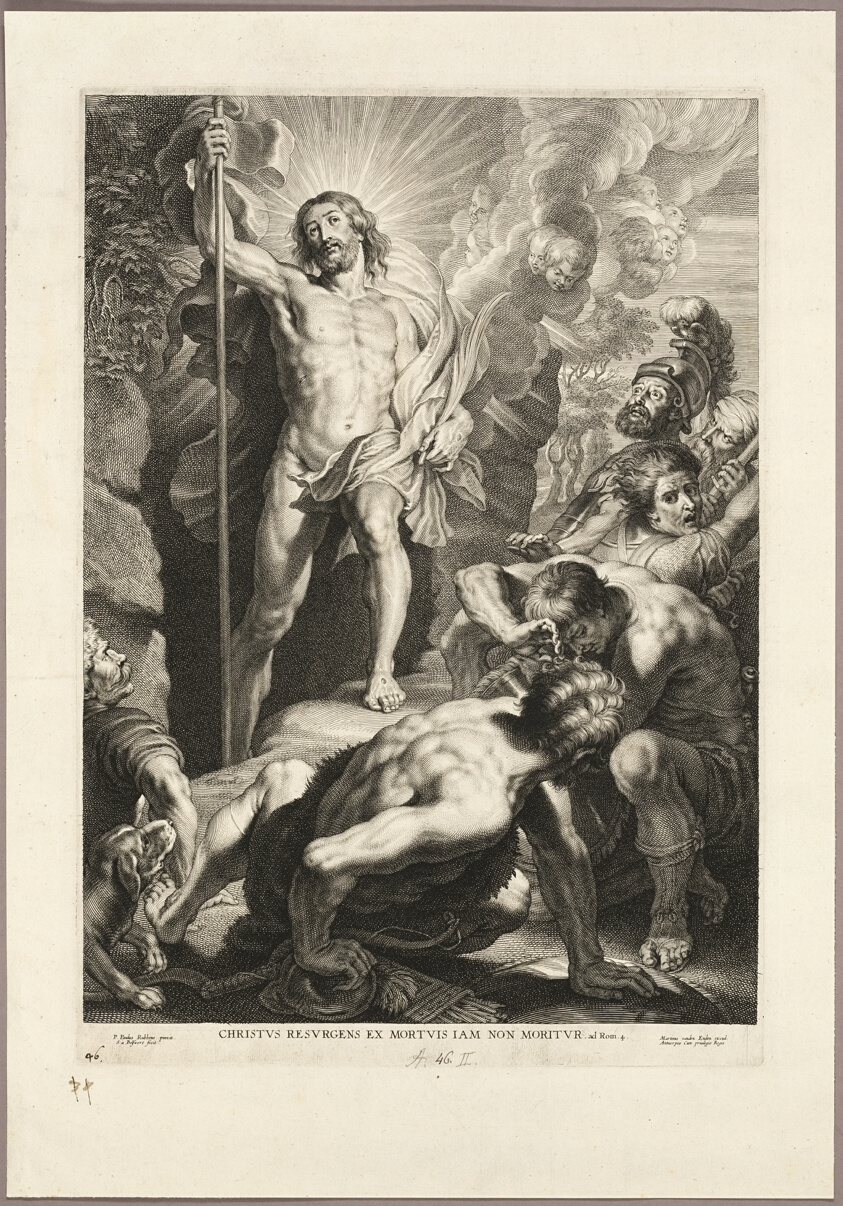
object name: Print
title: The Resurrection of Christ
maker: Schelte Adamsz. Bolswert (Dutch, active in Flanders, c. 1586–1659); after Peter Paul Rubens (Flemish, 1577–1640); published by Martin van den Enden (Flemish, 1605–1673)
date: 1630/45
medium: Engraving in black on ivory laid paper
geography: Netherlands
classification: engraving; paper; print; prints and drawing